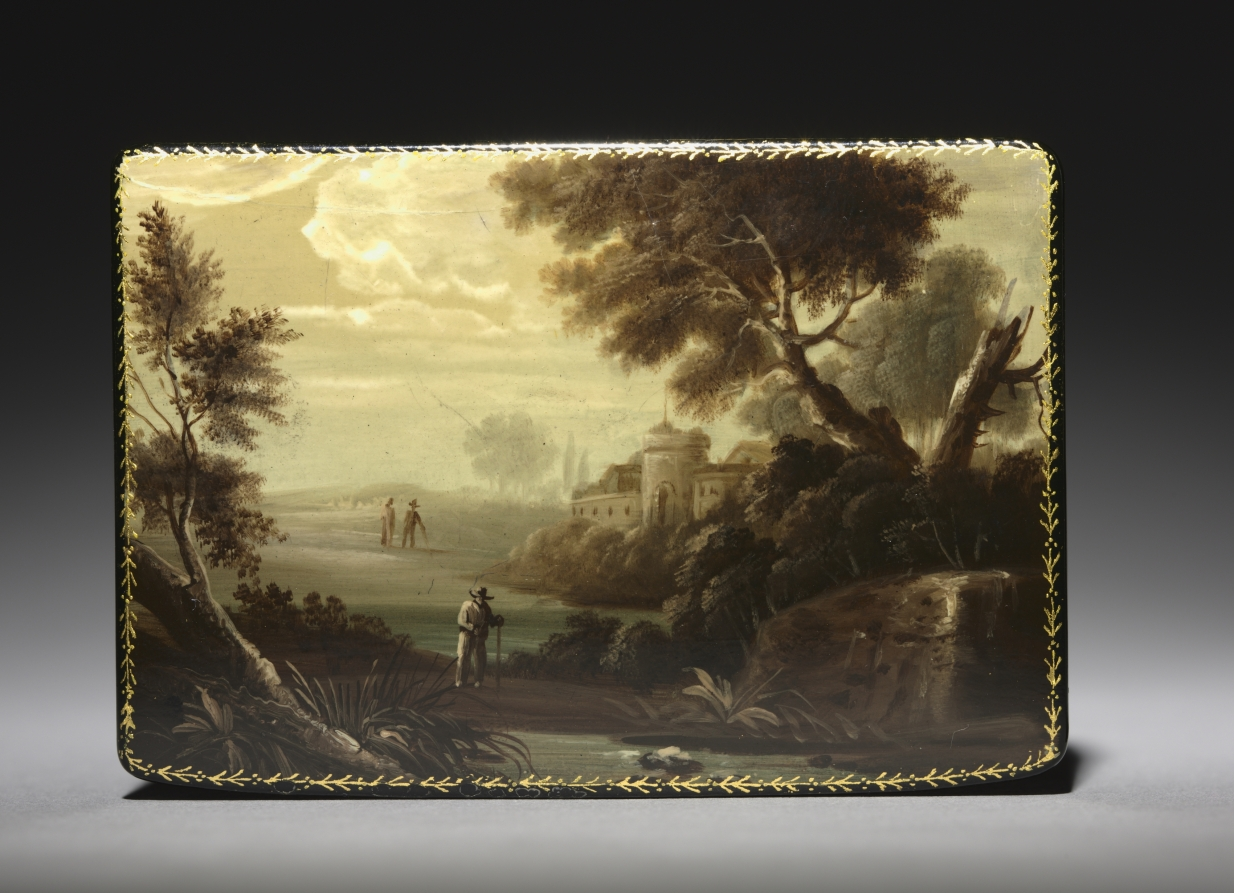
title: Snuff Box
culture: Russia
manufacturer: Lukutin Factory (Russian, 1818–1904)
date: 1800s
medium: wood with black lacquer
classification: Miscellaneous